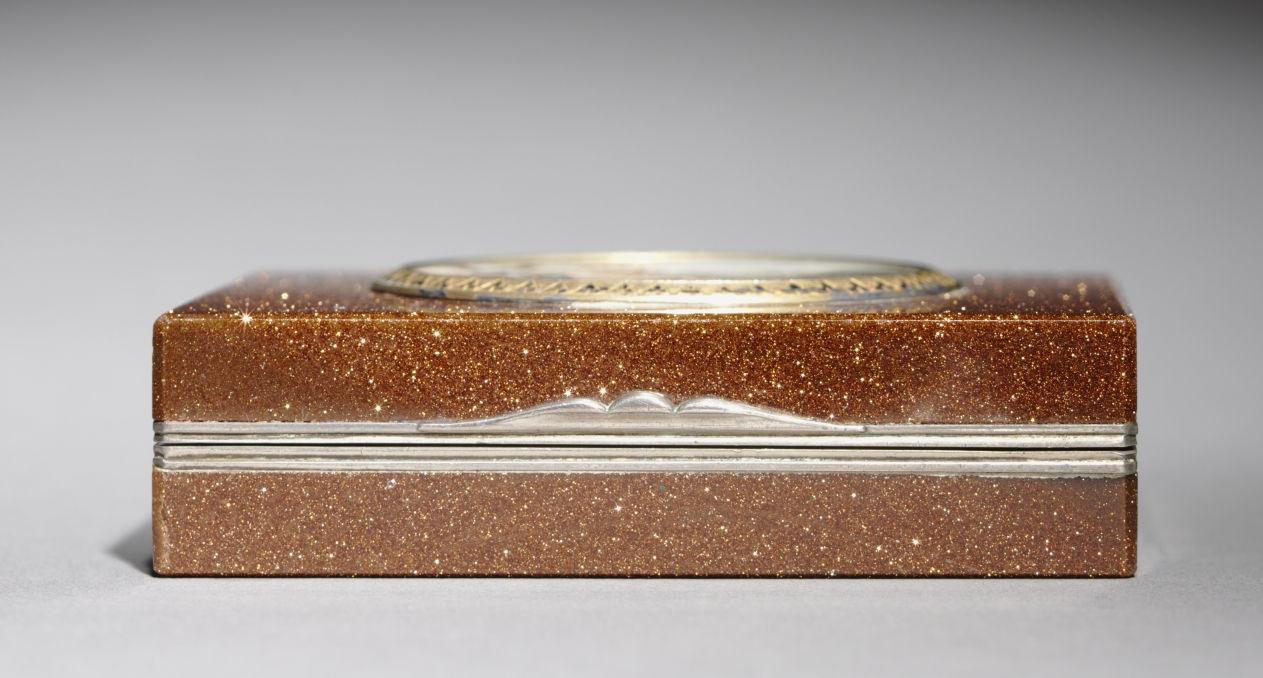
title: Snuff Box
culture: Italy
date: 1860–70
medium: goldstone, gold, micro mosaic glass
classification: Enamel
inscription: no marks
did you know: Hundreds of small glass tesserae make up the central image on the cover of this snuff box.